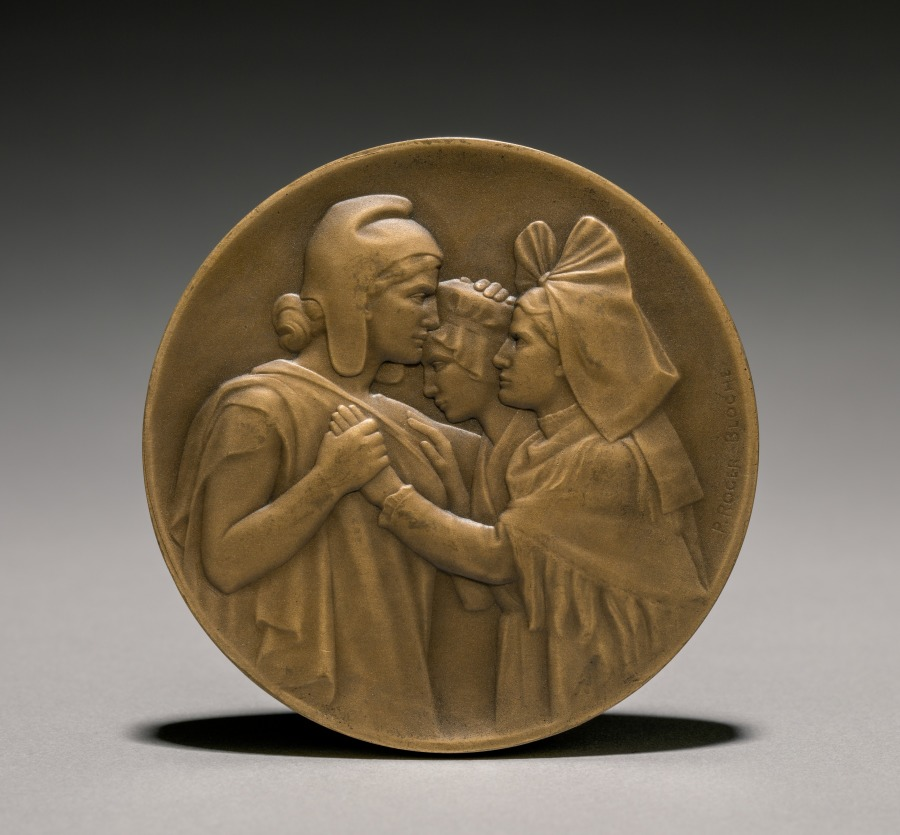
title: Medal (obverse)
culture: France, 20th century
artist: Paul Roger-Bloche (French)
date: 1900s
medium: bronze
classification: Metalwork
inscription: obverse - "Retour del 'Alsace et de la Lorraine à la France. 11 Novembre 1918."